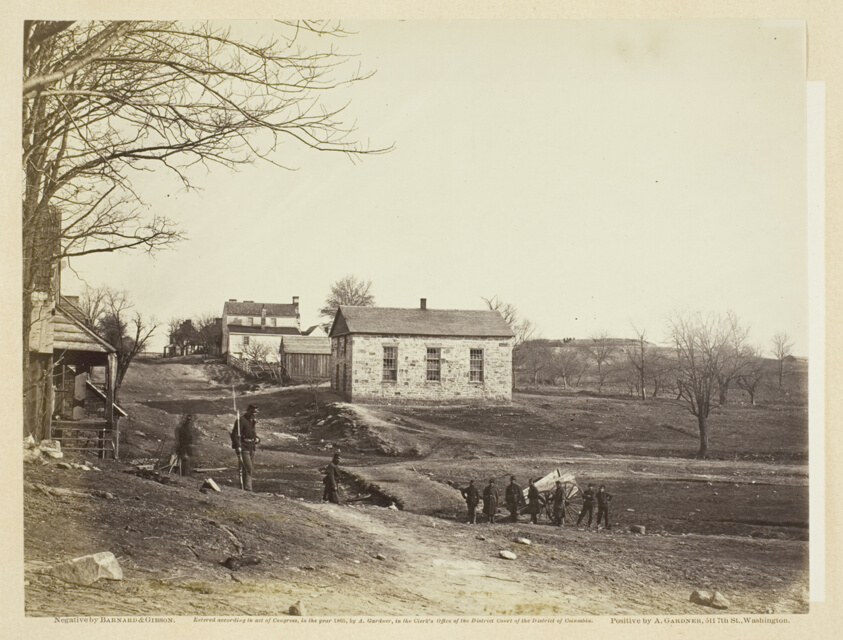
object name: Photograph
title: Stone Church, Centreville, Virginia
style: 19th century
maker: Barnard and Gibson (American, active 19th century)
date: March 1862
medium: Albumen print, pl. 4 from the album "Gardner's Photographic Sketch Book of the War, vol. 1" (1866)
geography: United States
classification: photograph; albumen silver print; photography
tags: Collected by Hugh Edwards, Gardner's Photographic Sketch Book